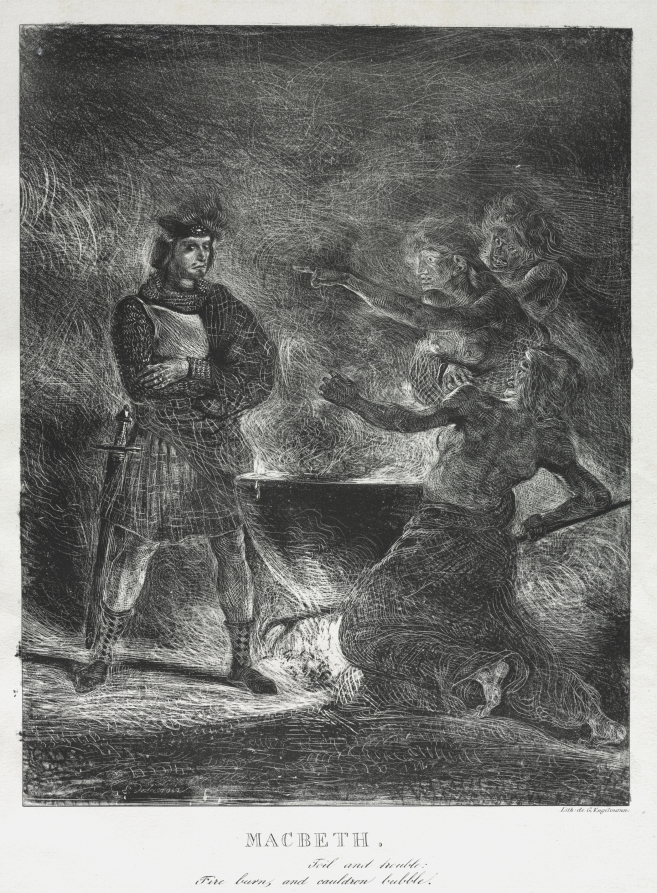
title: Macbeth Consulting the Witches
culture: France, 19th century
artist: Eugène Delacroix (French, 1798–1863)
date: 1825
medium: lithograph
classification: Print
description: A master lithographer, Delacroix experimented with the technique. By covering the surface of the stone with rich, black lithographic crayon and then scratching out the design with a sharp tool, Delacroix heightened the diabolical effect of this night scene where sorcerers tend to their boiling cauldron.